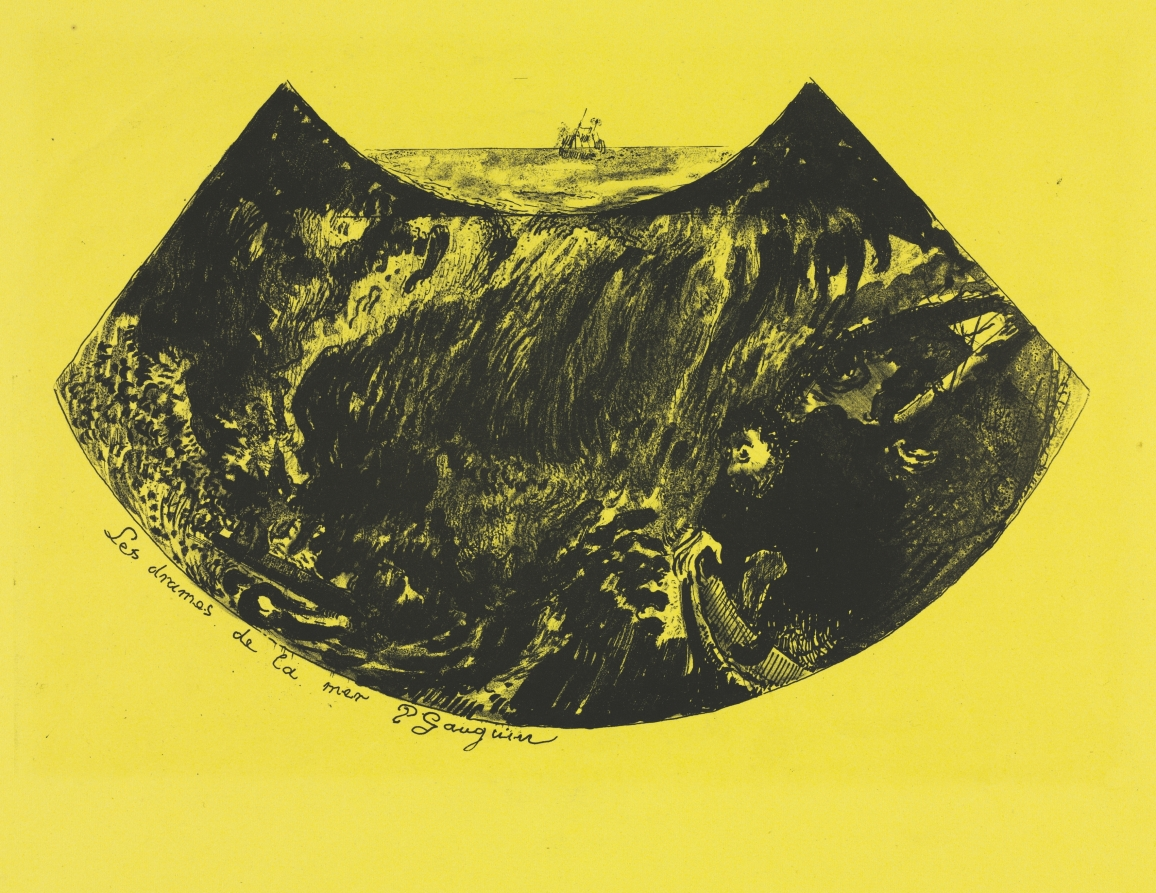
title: Volpini Suite: Dramas of the Sea (Les Drames de la Mer)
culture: France, 19th century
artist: Paul Gauguin (French, 1848–1903)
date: 1889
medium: zincograph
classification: Print